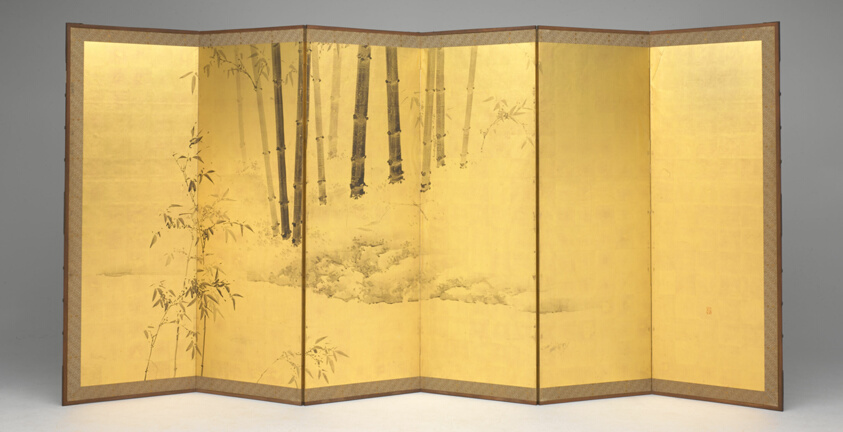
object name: Painting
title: Bamboo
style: Japanese (culture or style)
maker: Kishi Ganku (Japanese, 1749-1838)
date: early 19th century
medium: Pair of six-panel screens; ink and gold leaf on paper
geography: Japan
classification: painting